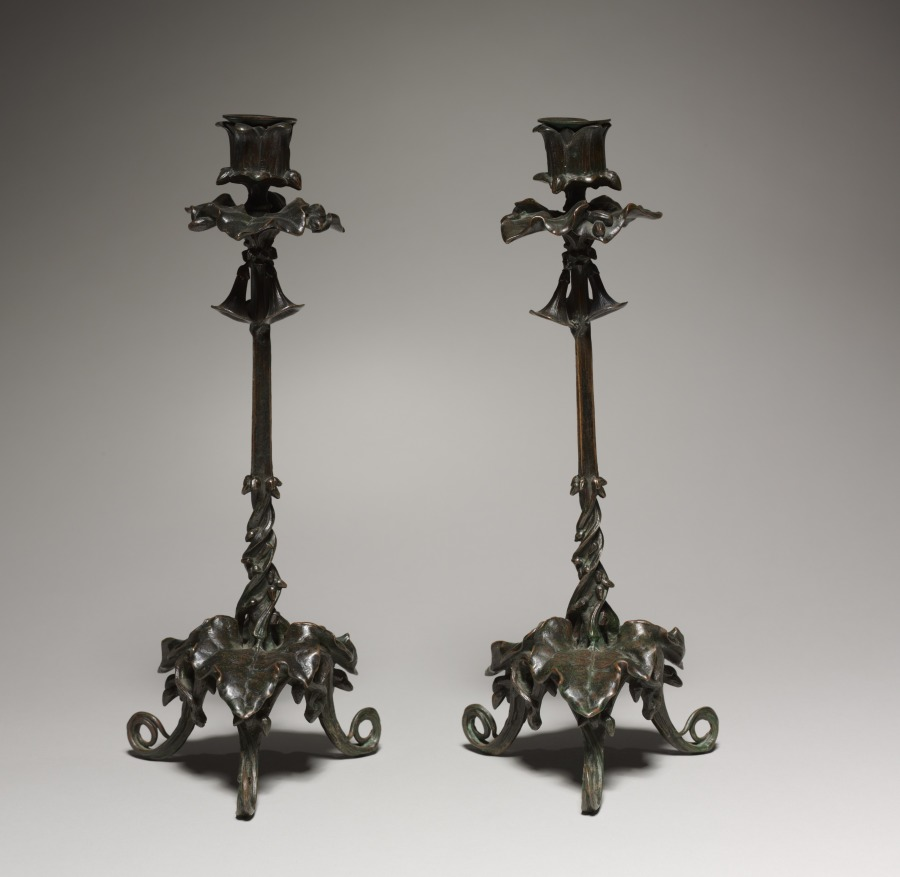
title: Candlesticks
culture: France, 19th century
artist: Antoine-Louis Barye (French, 1796–1875)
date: 1800s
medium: bronze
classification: Furniture and woodwork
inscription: signed on underside of one of ivy leaves on base: "BARYE."